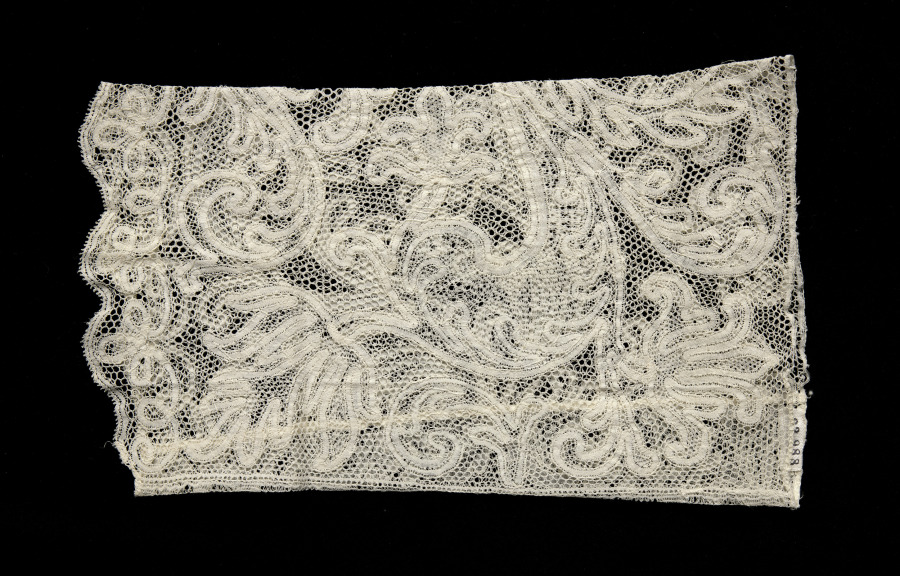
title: Lace Cuff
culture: Italy, Milan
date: 1600s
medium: Bobbin lace (Punto di Milano)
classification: Lace